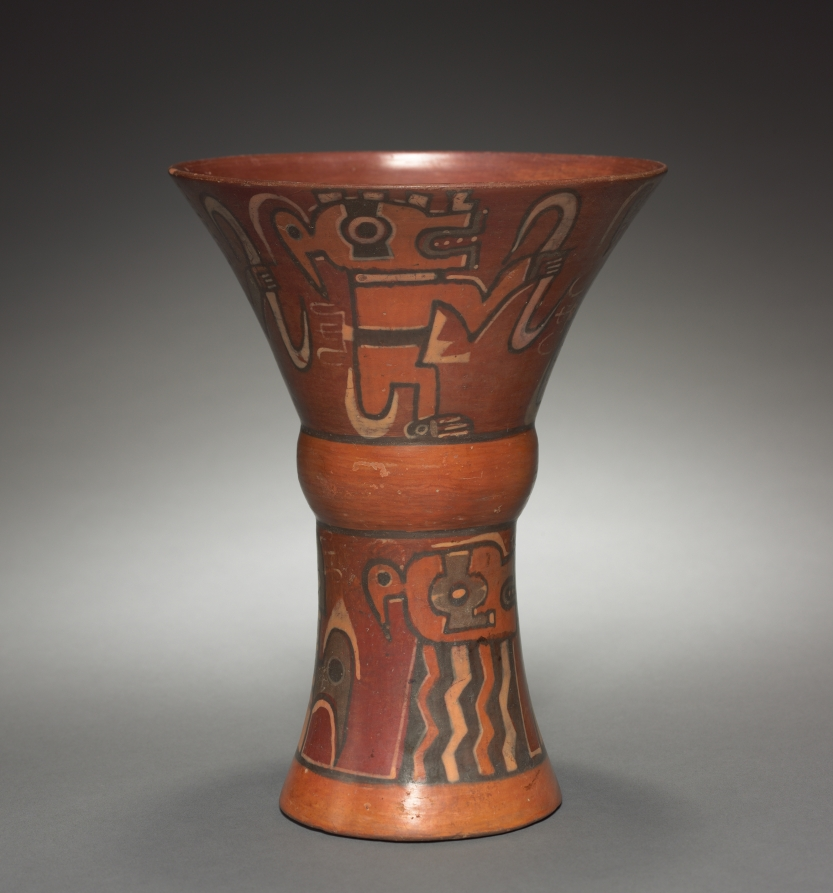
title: Kero (Waisted Cup)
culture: Bolivia, Cochabamba(?), Tiwanaku style, 400-1000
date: 400–1000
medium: earthenware with colored slips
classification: Ceramic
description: The kero is a distinctive Tiwanaku vessel form, imitated by the later Inka, who used the cups in political and religious ceremonies. It is assumed that the same was true at Tiwanaku, where impressive stone figures, perhaps rulers, hold keros as though they are emblems of authority. Perhaps, like the Inka, the Tiwanaku used keros to drink chicha, a corn beer shared to cement bonds of mutual obligation among allies.